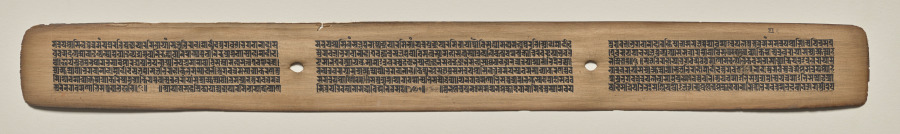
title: Text, Folio 144 (recto), from a Manuscript of the Perfection of Wisdom in Eight Thousand Lines (Ashtasahasrika Prajnaparamita-sutra)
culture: Eastern India, Bihar, Vikramashila Monastery. Painting: Nepal, Kathmandu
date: Sunday, September 14, 1119 (year 239 of the Newar Samvat in the month of Ashvina)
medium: gum tempera and ink on palm leaves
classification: Painting